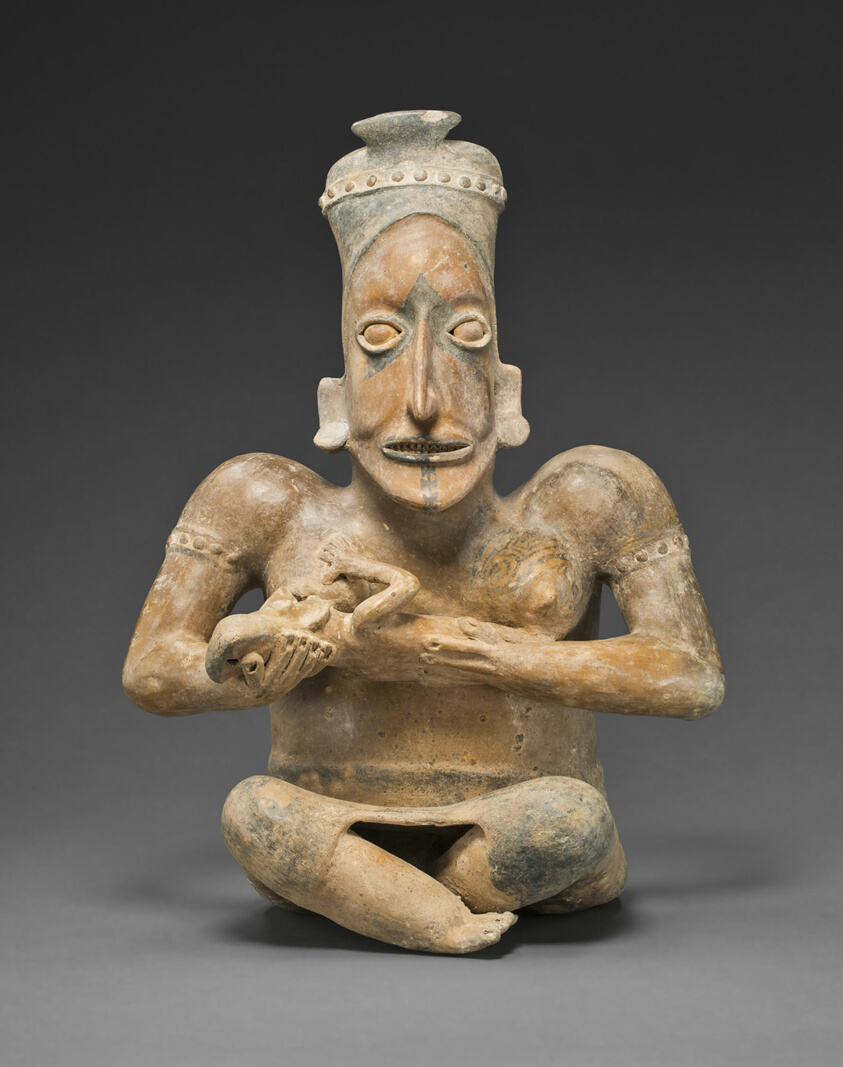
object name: Sculpture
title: Seated Maternity Figure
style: jalisco, ameca, mesoamerican, Arts of the Americas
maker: Jalisco, Ameca style; Jalisco, Mexico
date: 100 BCE–300 CE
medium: Ceramic and pigment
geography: Colima state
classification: sculpture; art of the americas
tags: mothers, children, people